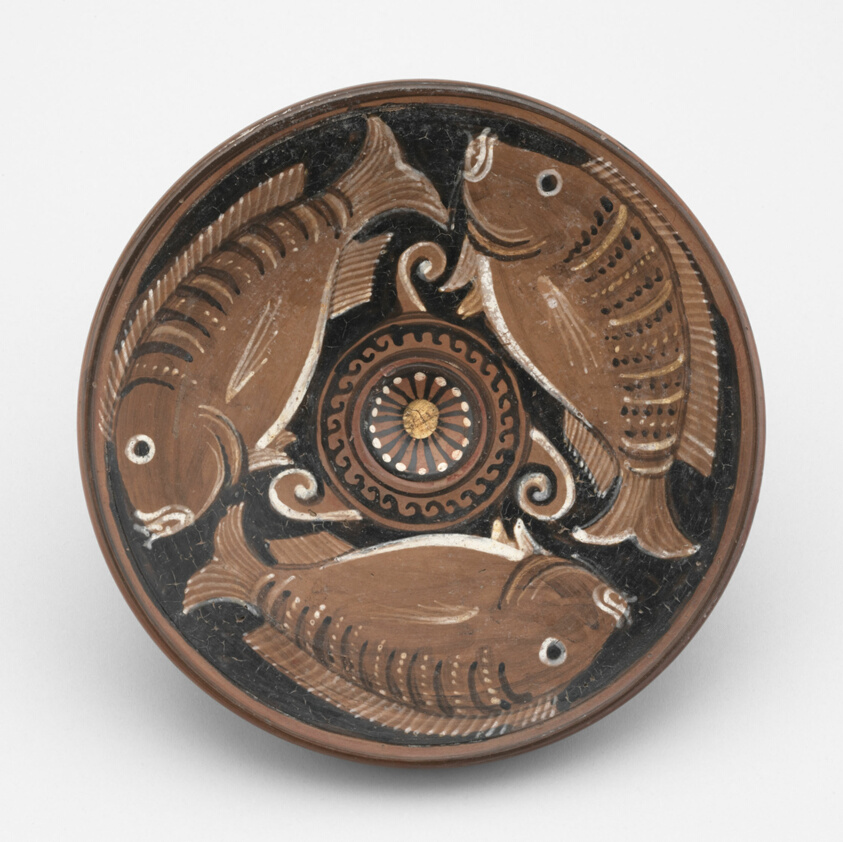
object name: Vessel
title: Fish Plate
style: red-figure, ancient, greek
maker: Attributed to the Hippocamp Group; Greek; Canosa, Apulia, Italy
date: 350-325 BCE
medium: terracotta, red-figure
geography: Canosa di Puglia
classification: plate (general, dish); dish (vessel); earthenware; ancient art; ceramics; vessel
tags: fish